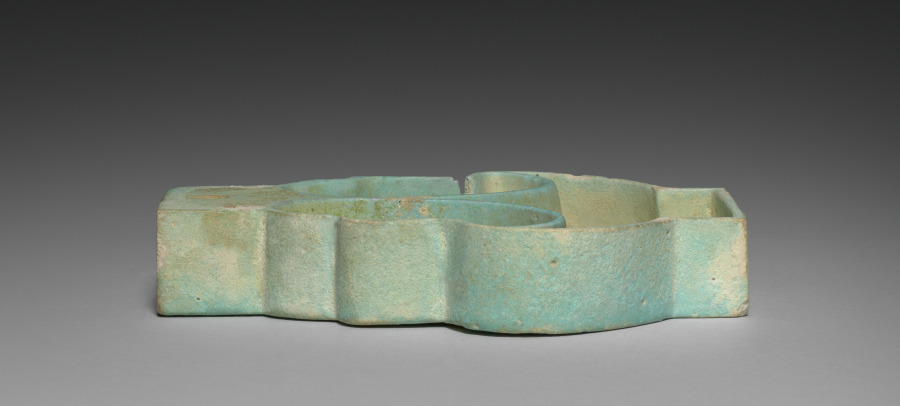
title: Box (Pyxis) in the Form of a Composite Capital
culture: Egypt, Greco-Roman period (332 BCE–395 CE), Ptolemaic dynasty (305–30 BCE)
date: 305–30 BCE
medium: pale robin's-egg blue faience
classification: Vessels